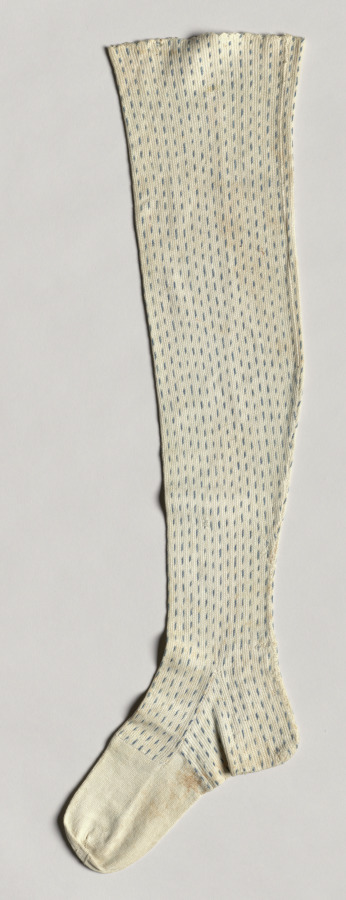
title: Stocking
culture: America, New York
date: 1790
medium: knitting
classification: Knitting